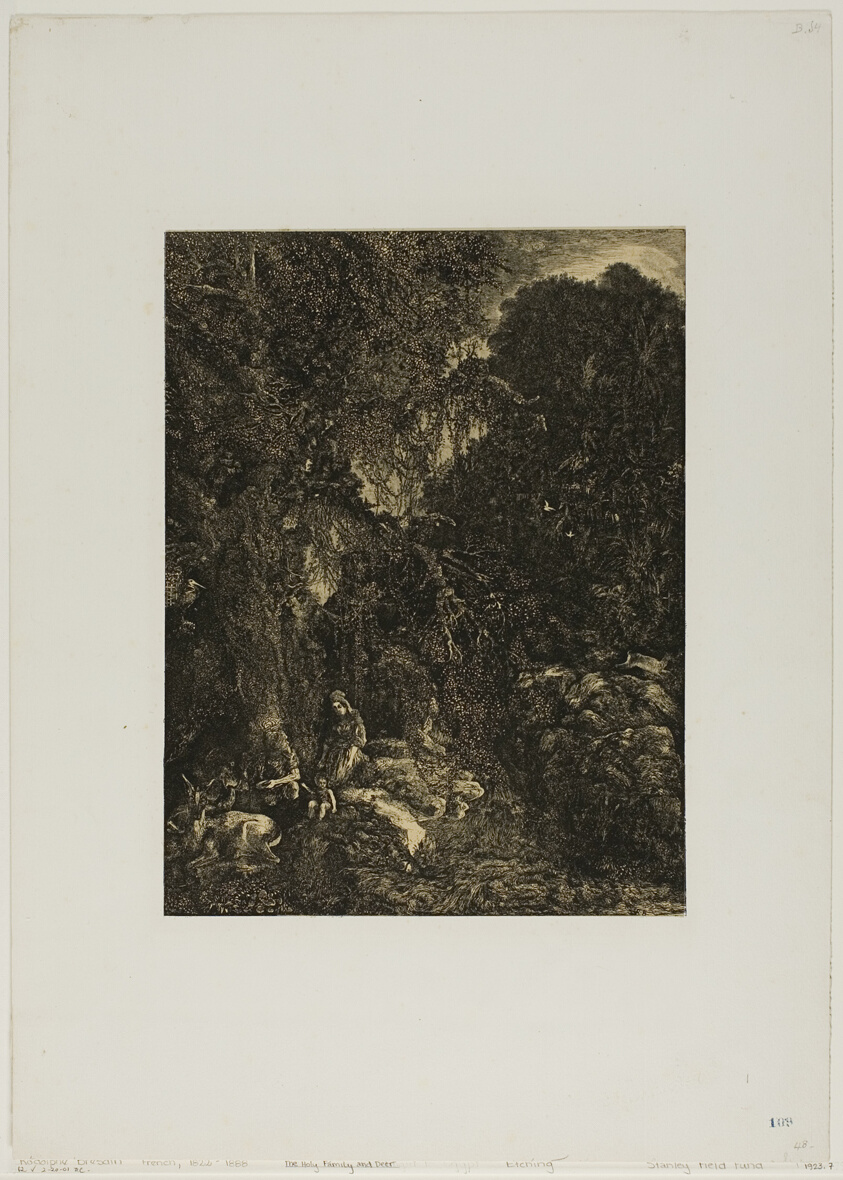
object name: Print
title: Holy Family with Deer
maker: Rodolphe Bresdin (French, 1825-1885)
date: 1871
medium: Lithograph (etching transfer) on cream China paper laid down on white wove paper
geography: France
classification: lithograph; print; prints and drawing